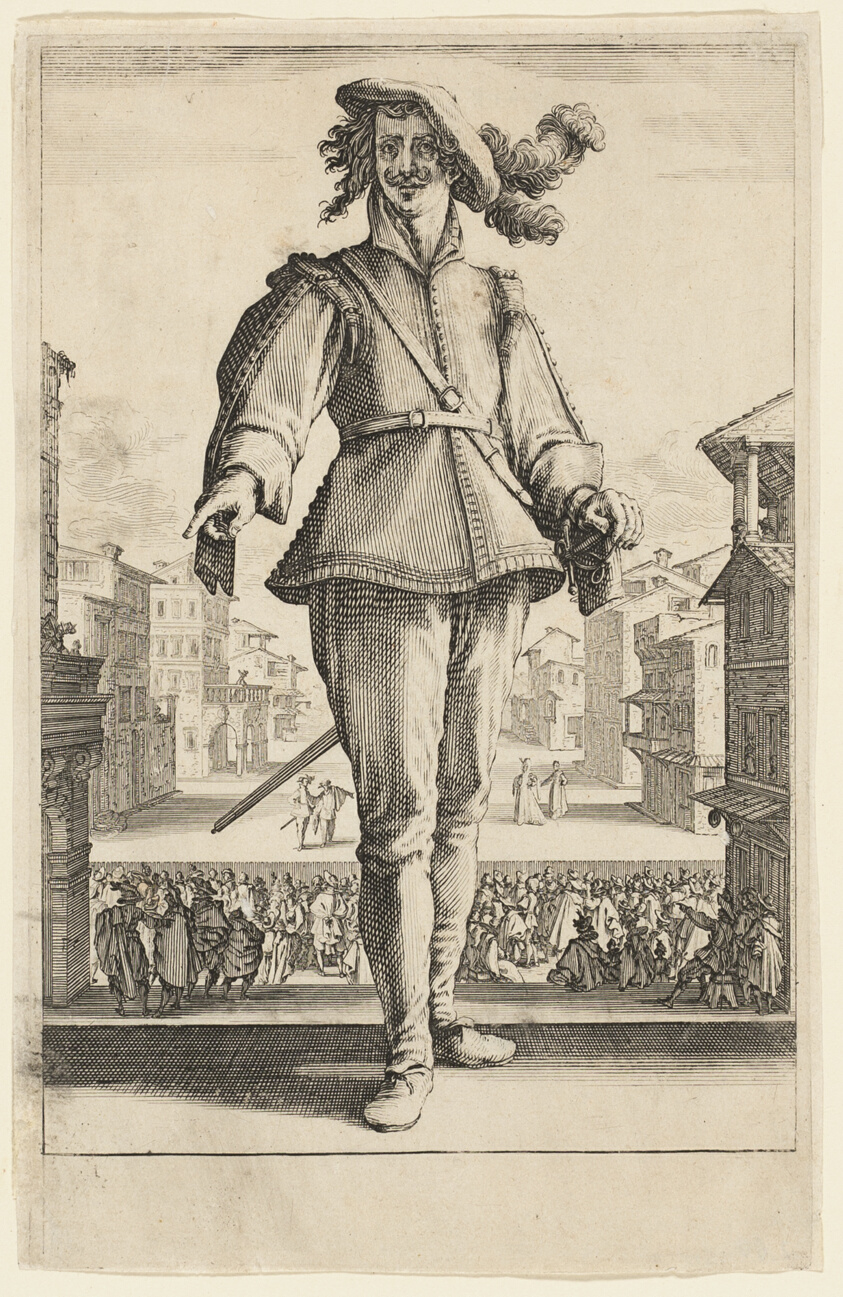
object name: Print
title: The Captain or The Lover, from Three Italian Comedians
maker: Jacques Callot (French, 1592-1635)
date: 1618–20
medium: Etching on paper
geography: France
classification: etching; print; prints and drawing